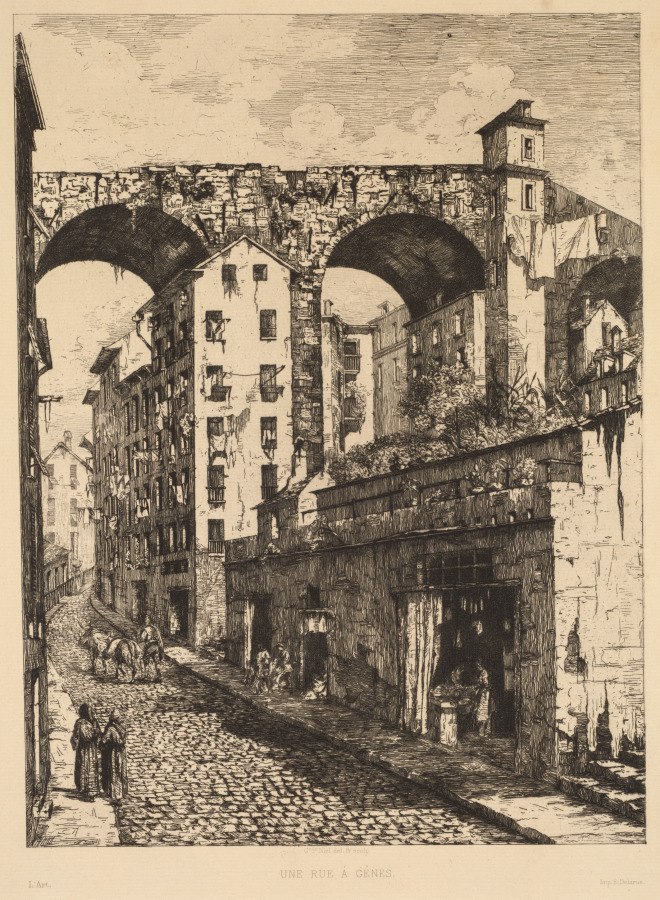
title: A Street in Genoa (Une rue à Gênes)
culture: France, 19th century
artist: Gabrielle Niel (French, 1831–1919)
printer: Printed by E. Delarue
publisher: L'Art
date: 1878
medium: etching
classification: Print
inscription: Below image, center: celle Niel de. & Sculp; Eau-Forte originale par Gabriell-Marie Niel. Publié e dans "L'ART" en 1878, Imp. E. Delarue